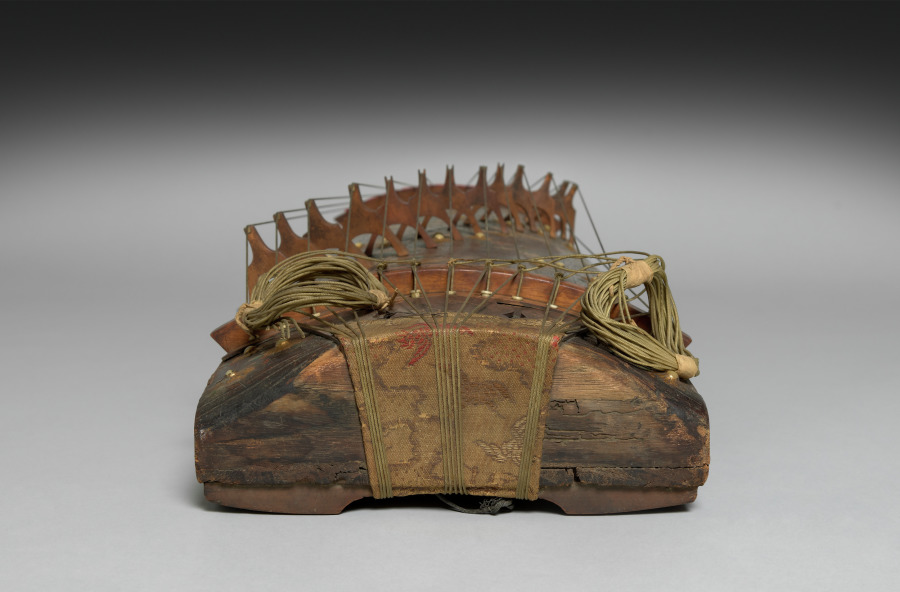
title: Koto (Zither)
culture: Japan, Edo period (1615–1868)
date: early to mid-1800s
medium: Wood with colored lacquer, sprinkled gold powder (maki-e), textile, and silk strings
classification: Musical Instrument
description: This koto has an elaborately decorated surface, suggesting that it was meant to be admired as a decorative object rather than played as a musical instrument. The vertical design shows a profusion of chrysanthemum flowers and miscanthus grass above a brushwood fence as well as a pair of butterflies.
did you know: The koto descended from the guzheng, a Chinese zither first imported to Japan in the seventh century.